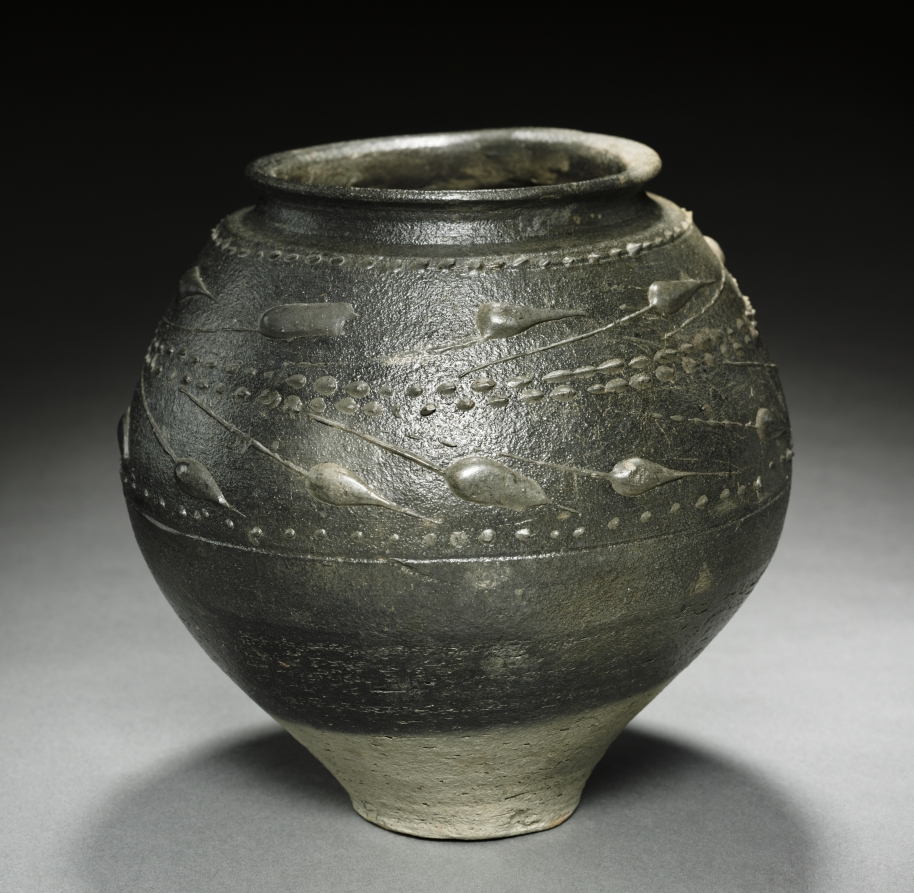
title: Globular Pot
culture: Rhenish (Cologne), Gallo-Roman, 2nd quarter 1st Century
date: 25–50 CE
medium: gray ware with black burnished slip and Barbotine decoration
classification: Ceramic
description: This pot is decorated with a pattern of leaves arranged in two rows, separated by parallel lines of dots. The vessel was thrown on a potter’s wheel and covered in a dark slip, leaving about two inches above the foot bare. After the Romans occupied Gaul (modern day France and Belgium) in the 1st century BCE, pots like this one with dark brown or black slips became increasingly popular in the northern provinces of the Roman Empire.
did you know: This pot’s decoration was applied using the barbotine method, in which a reed or horn is used to pipe clay slip onto the surface.